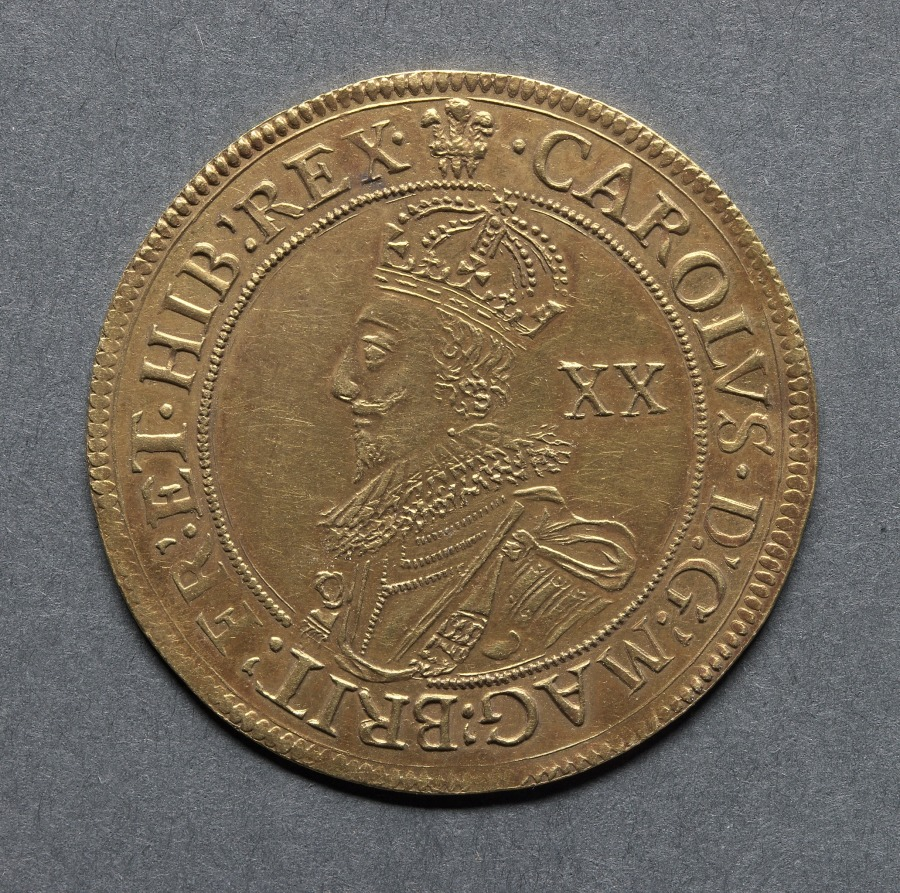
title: Unite: Charles I (obverse); Crowned Shield (reverse)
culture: England, Charles I, 1625-1649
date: 1630–1631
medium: gold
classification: Coins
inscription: CAROLUS DG MAG BRIT FR ET HIB REX, XX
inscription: FLORENT CONCORDIA REGNA, CR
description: When compared with the Charles I Unite struck in 1625 (1969.192), the finer work and clarity of detail in this work is remarkable. This coin and others of the same period were likely struck by the same form of mechanical process, although this was probably struck as a proof and not meant for circulation.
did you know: The unite was named after the legends on the coin indicating the king's intention of uniting his two kingdoms of England and Scotland.